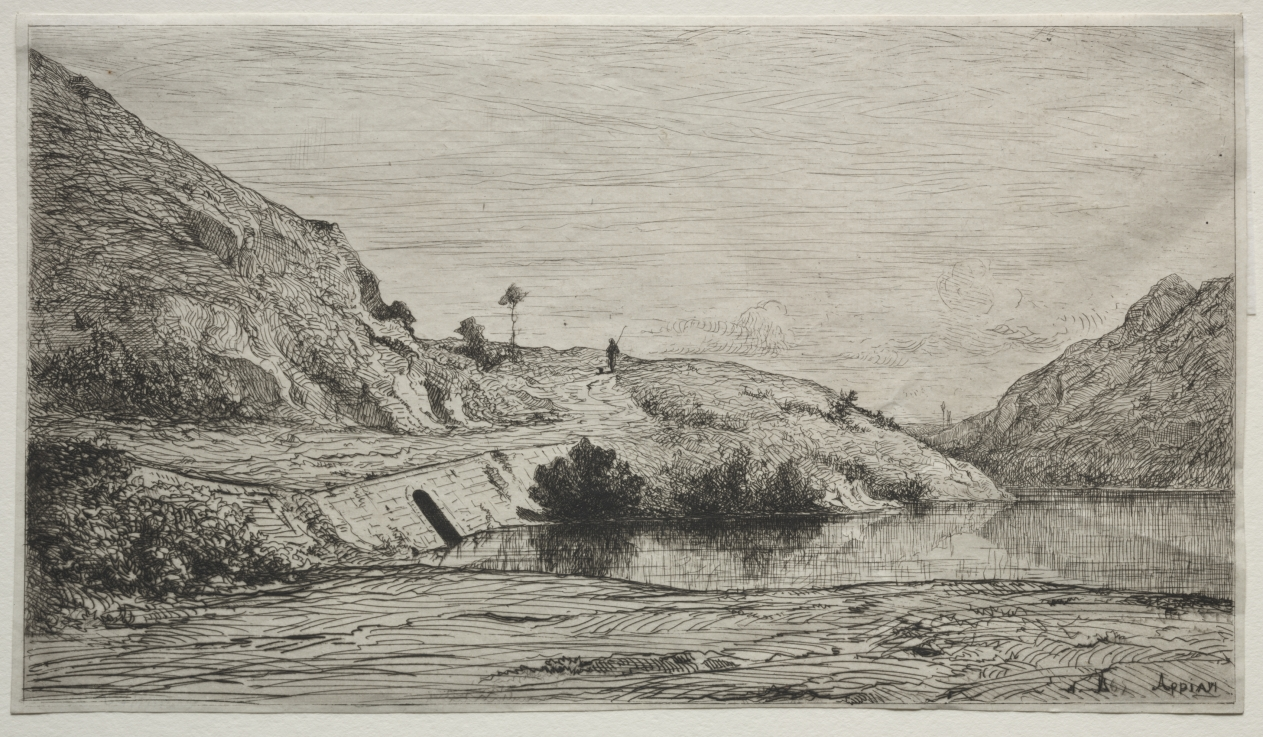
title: Banks of the Rhone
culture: France, 19th century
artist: Adolphe Appian (French, 1818–1898)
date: 1865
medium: etching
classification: Print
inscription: lower right, in plate: A 65 Appian